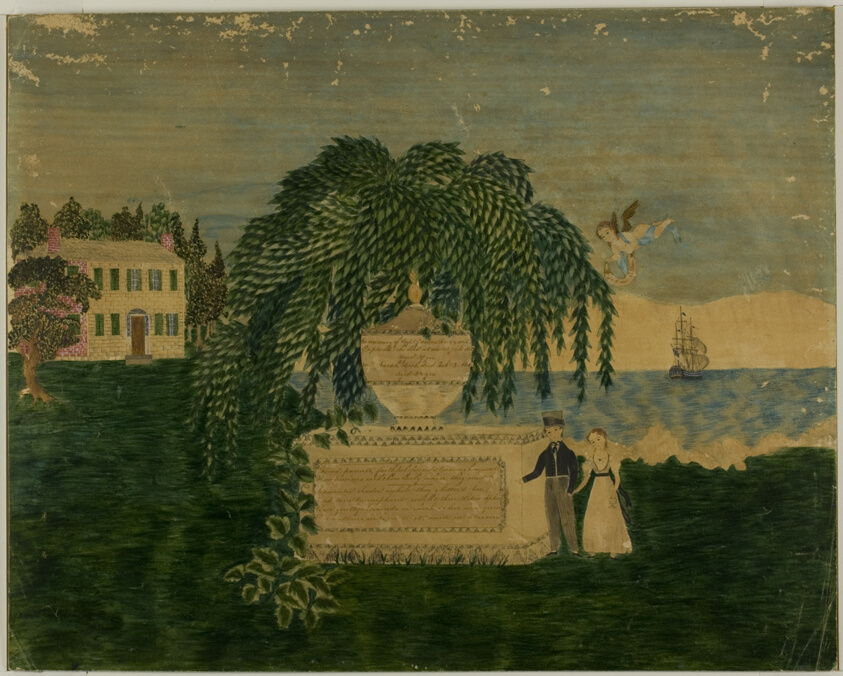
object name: Drawing and Watercolor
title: Grave of Captain and Mrs. Rich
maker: Unknown Artist; American, 19th century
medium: Watercolor with pen and black and blue ink and pasted collage elements on cream wove paper, laid down on masonite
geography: United States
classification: watercolor; drawings (visual works); prints and drawing